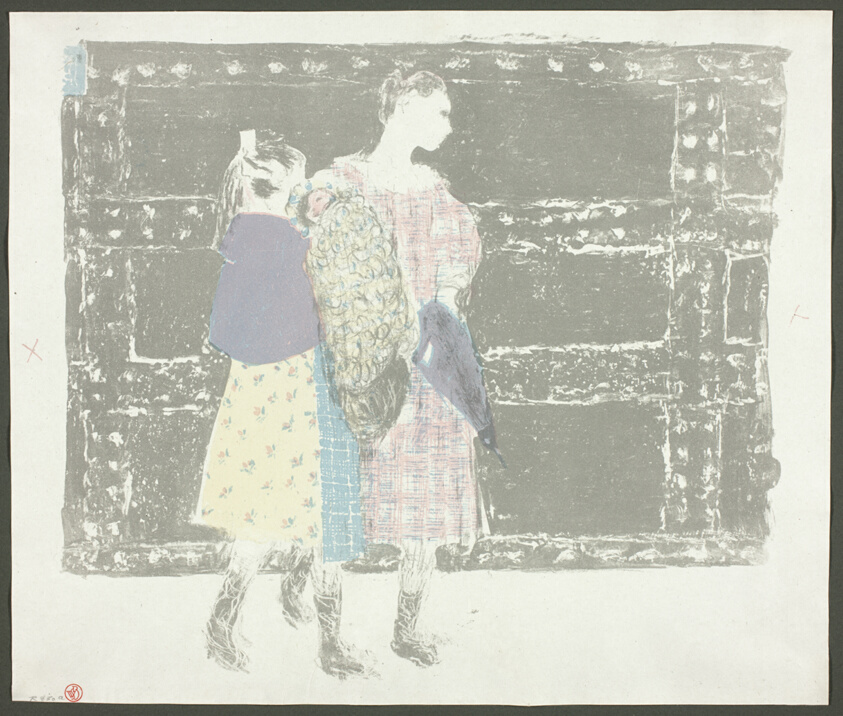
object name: Print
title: On the Bridge of Europe, plate nine from Landscapes and Interiors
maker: Edouard Vuillard (French, 1868-1940); printed by Auguste Clot (French, 1858-1936); published by Ambroise Vollard (French, 1867-1939)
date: 1899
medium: Color lithograph on grayish-ivory China paper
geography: France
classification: lithograph; print; prints and drawing